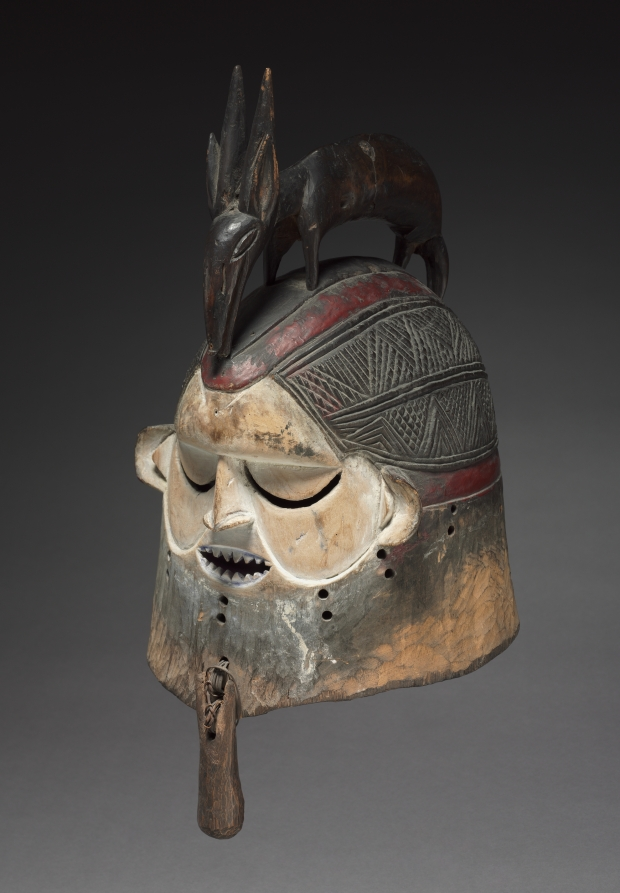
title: Mask (hemba)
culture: Africa, Central Africa, Democratic Republic of Congo, Suku-style carver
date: late 1800s–early 1900s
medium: Wood, reed, paint, and metal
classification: Mask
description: Suku helmet masks are often used in initiation ceremonies for young men in the society. Helmet masks such as this represent images of deceased elders in the society. They are to ensure successful hunting, help cure illnesses, and protect its wearer from evil. The animal shaped like a gazelle or antelope is typically associated with folktales, proverbs, and personal hunting exploits.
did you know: Suku helmet masks are often used in initiation ceremonies for young men in the society.